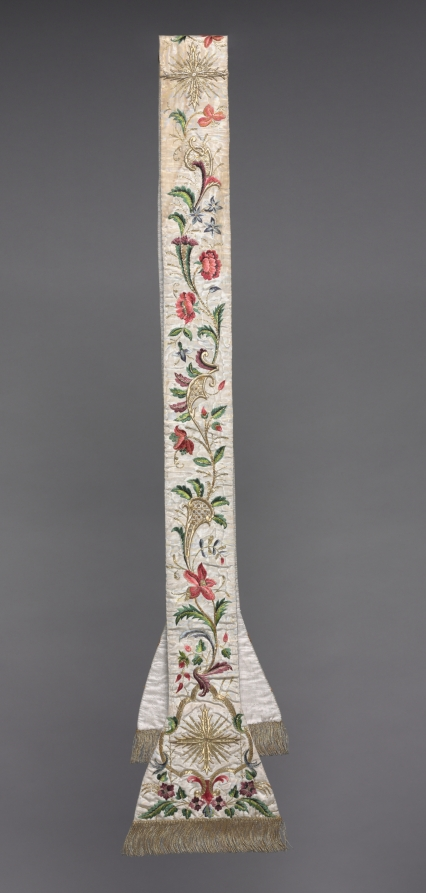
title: Embroidered Stola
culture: Italy or Spain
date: 1700s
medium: silk and metal on satin: embroidery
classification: Embroidery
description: A beautiful design emanates from a vase in the center, displaying symmetrical flora that extend across embroidered gold braids into graceful curvilinear cartouches, reflecting contemporary architectural decoration. Also in the center, sheaves of wheat and grapes represent the bread and wine of the Mass. Gold sequins within thread-outlined squares illustrate fine quality workmanship. The decoration of the stole and chalice veil is similar to the chasuble, also on moiré (watered) silk fabric. The stole, an insignia of the office of deacons and priests, is worn under a chasuble, and the chalice veil—bearing the monogram of Jesus Christ, IHS, in the center—covers the chalice and paten (the plate holding the Eucharistic bread).